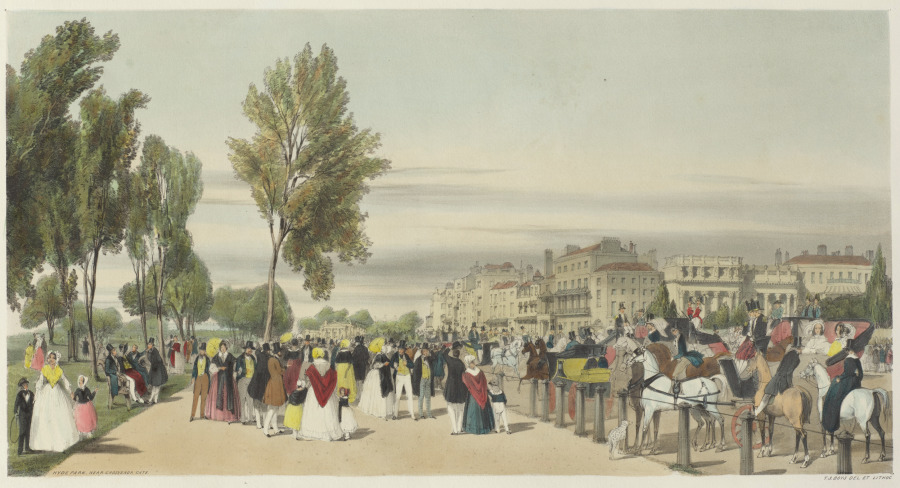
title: London As It Is: Hyde Park, near Grosvenor Gate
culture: England, 19th century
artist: Thomas Shotter Boys (British, 1803–1874)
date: 1842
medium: lithograph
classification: Bound Volume